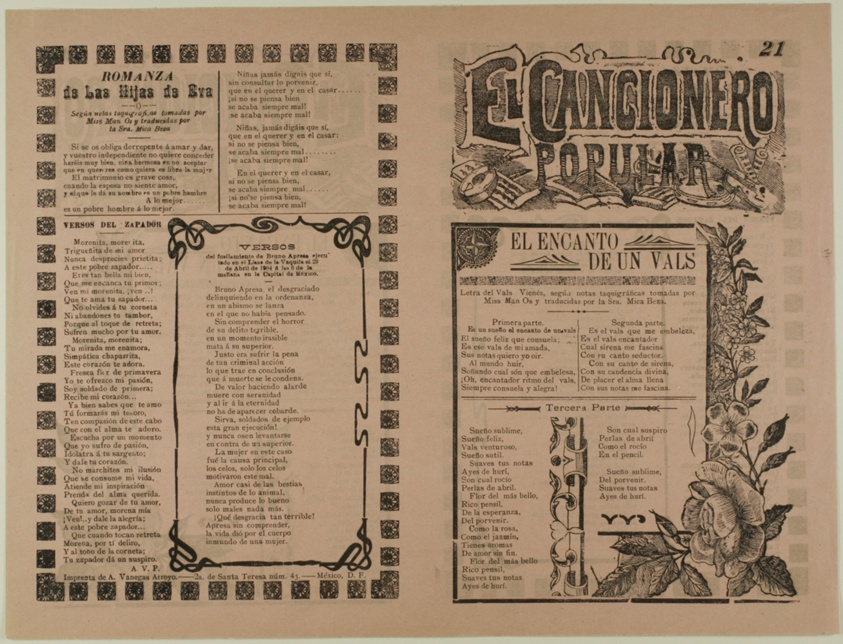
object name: Print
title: El cancionero popular, num. 21 (The Popular Songbook, No. 21)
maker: Manuel Manilla (Mexican, 1830-c.1900); José Guadalupe Posada (Mexican, 1852-1913)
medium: Relief print on paper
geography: Mexico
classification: relief etching; print; prints and drawing